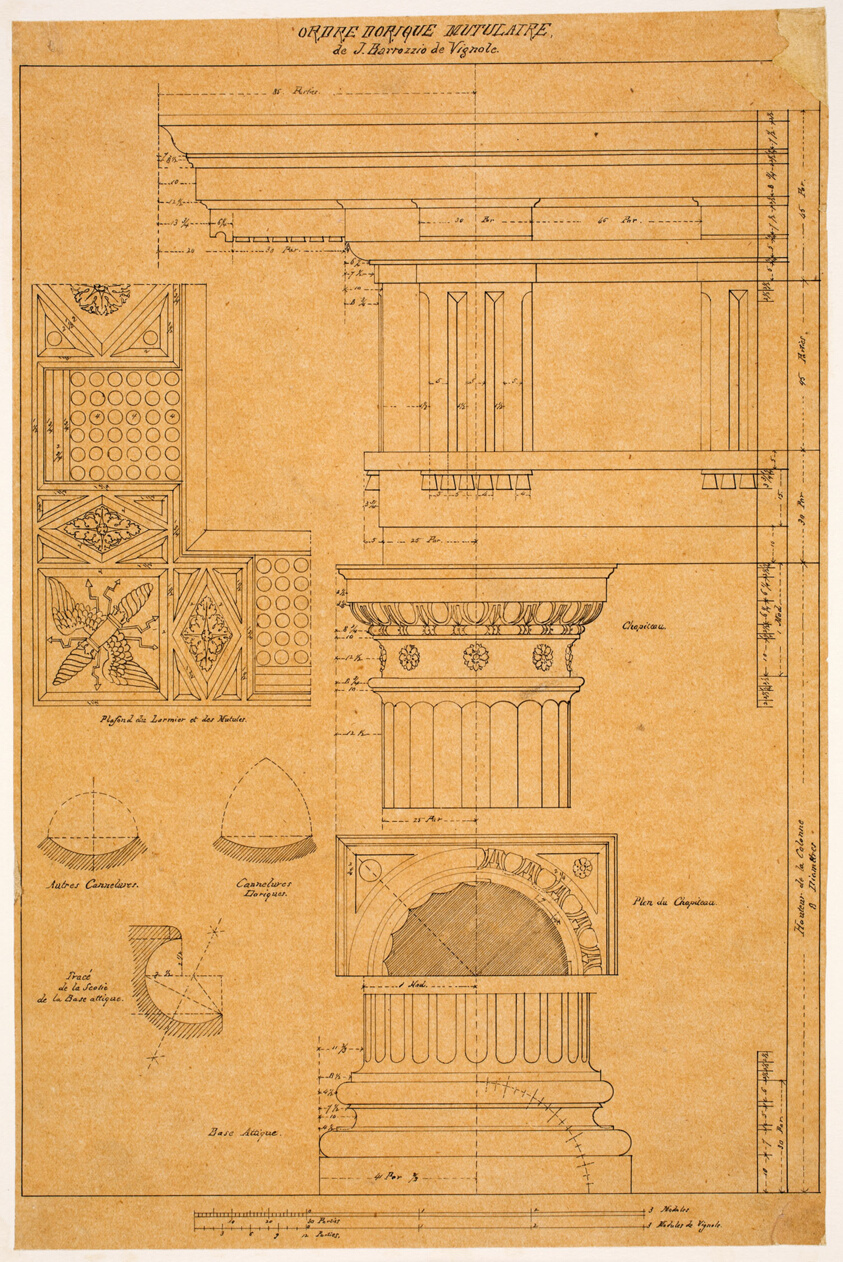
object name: Architectural Drawing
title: Doric Order Details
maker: Louis H. Sullivan (American, 1856-1924)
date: c. 1875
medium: Various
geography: United States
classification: architectural drawing